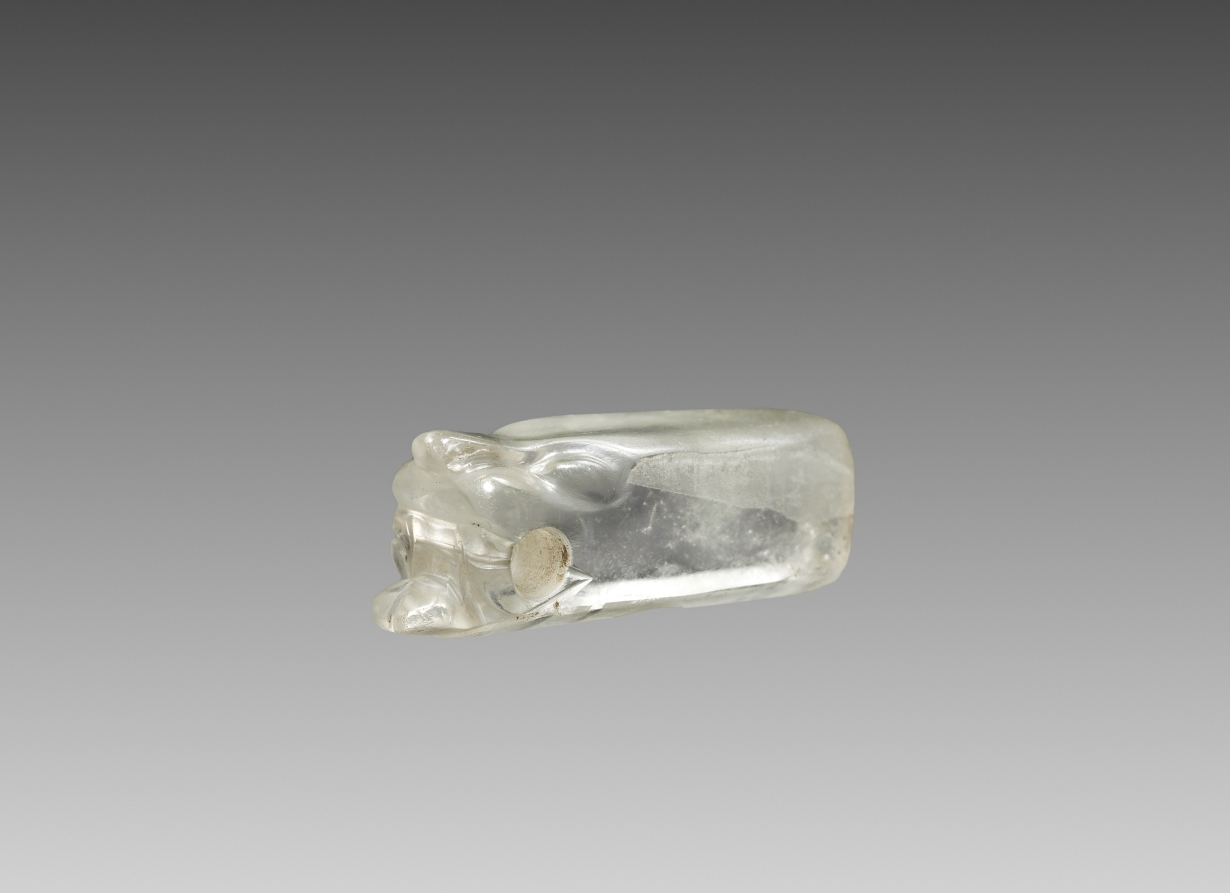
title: Serpent Labret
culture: Mexico, Oaxaca, Mixtec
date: 1350–1519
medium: rock crystal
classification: Sculpture